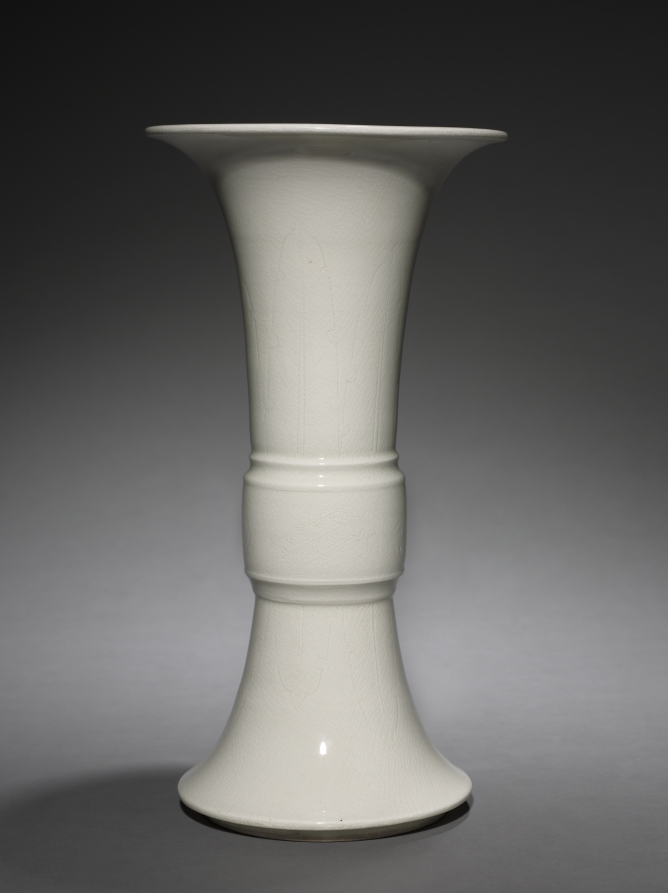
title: Beaker Vase: Zun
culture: China, Qing dynasty (1644-1911), Kangxi reign (1661-1722)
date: 1661–1722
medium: porcelain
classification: Ceramic